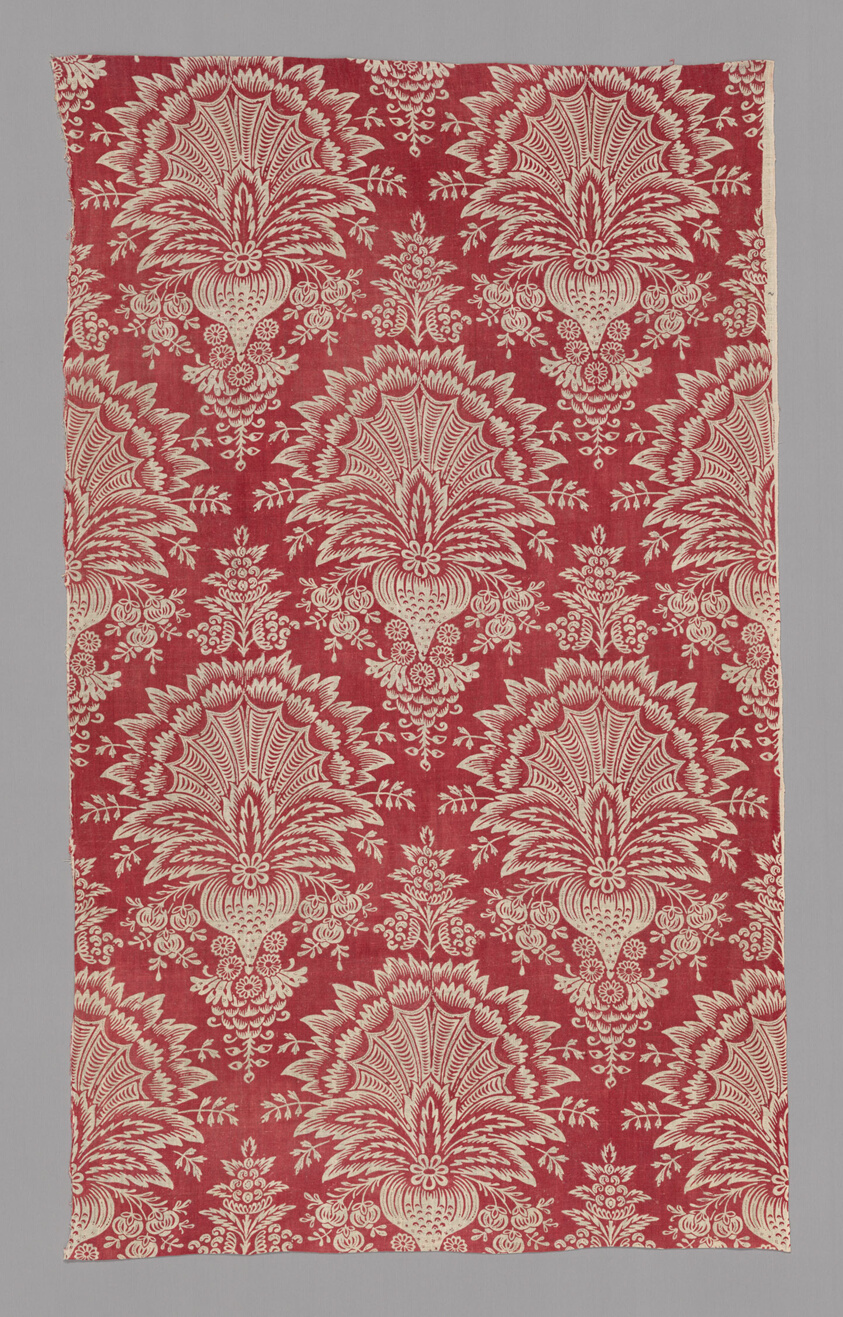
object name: Textile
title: Panel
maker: France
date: c. 1830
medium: Cotton, plain weave; block printed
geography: France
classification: textile; weaving - printed; printed textile